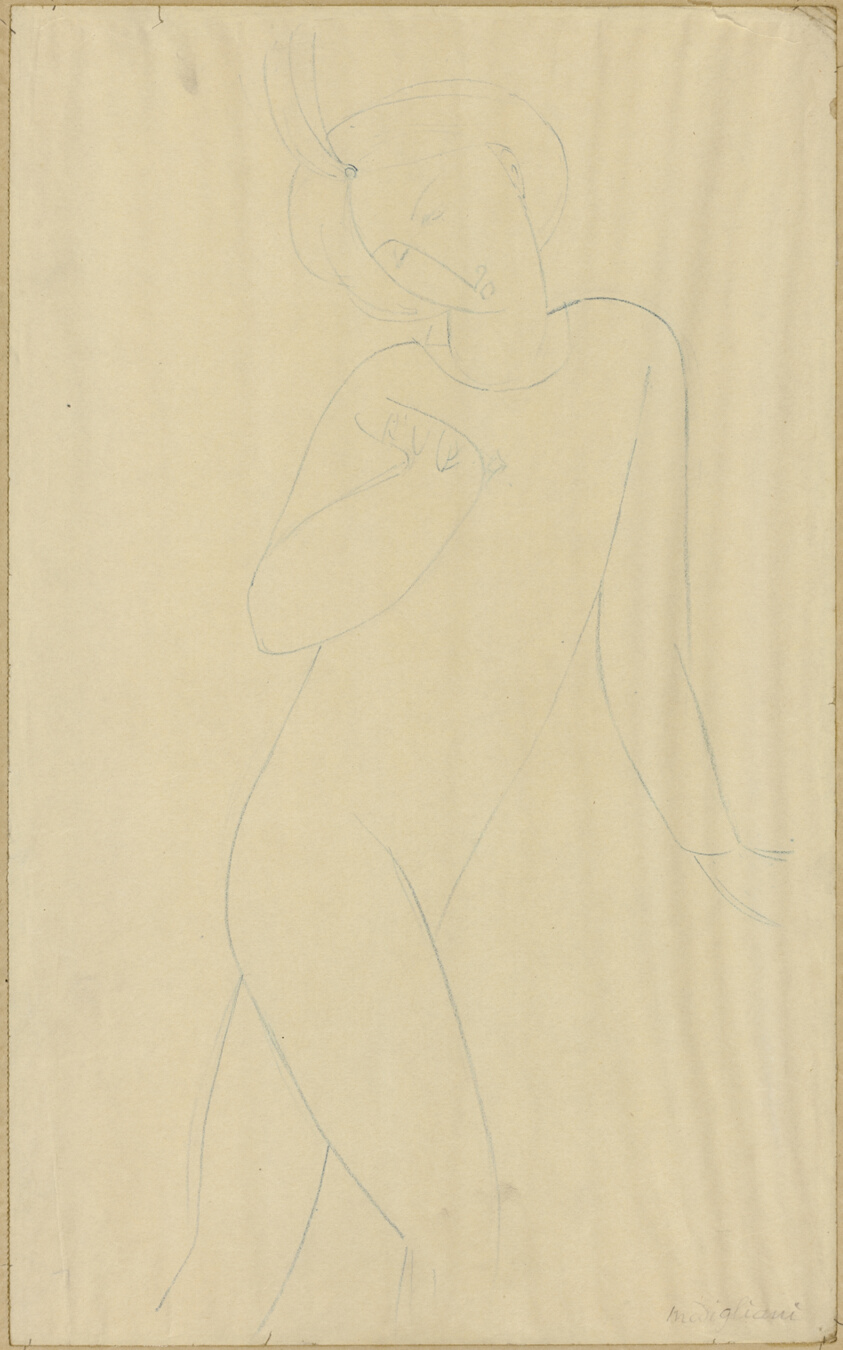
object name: Drawing and Watercolor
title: Man in Ballet Costume Wearing a Turban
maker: Amedeo Modigliani, style of; Italian, 1884-1920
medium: Blue crayon, on cream wove paper, perimeter mounted to tan wove paper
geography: Italy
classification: crayon; drawings (visual works); prints and drawing